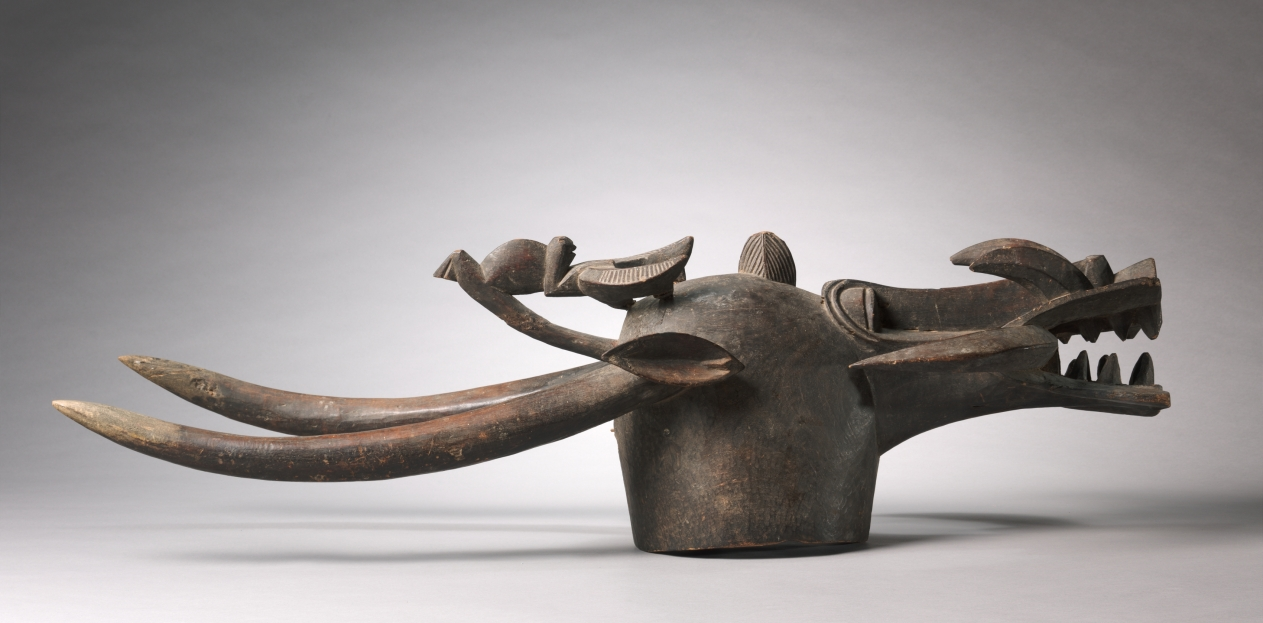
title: Helmet Mask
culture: Western Sudan, Ivory Coast, Senufo, 20th century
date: early to mid-1900s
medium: wood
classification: Mask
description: The iconography of this helmet mask is comprised of sculpted renderings of different animal attributes including a ram's horns, a warthog's tusks, a crocodile's mouth, and a hyena's snout. Carved between the long antelope horns is a miniature chameleon that holds an abstract wing-shaped motif called mangele. Intended to impress and terrify, the sculpture's fearsome aesthetic alludes to the mask's power as an anti-sorcery device.